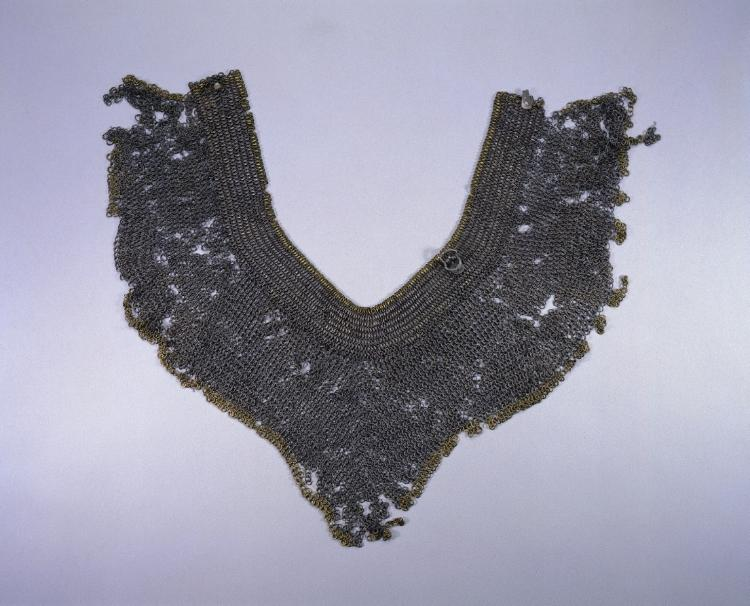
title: Collar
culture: European, 15th century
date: 1400s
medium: riveted steel rings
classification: Arms and Armor